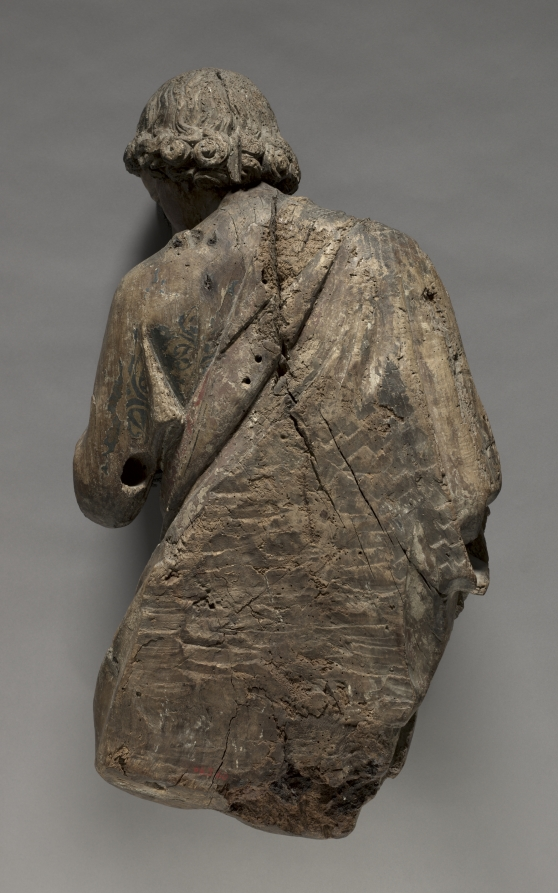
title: Angel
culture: France, vicinity of Reims, 13th century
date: c. 1250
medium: walnut with traces of gilding and polychromy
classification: Sculpture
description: Surviving in fragmentary condition, this pair of angels lacks lower arms, hands, wings, and attributes. Their original paint and gilding, now almost entirely lost, once rendered their garments a rich brocade and their hair a luxuriant gold. Nonetheless, in their graceful poses and sublime faces—which may portray tragic interest, anguish, or deep concern—their original delicacy and power are still evident. They embody the monumental style of 13th-century High Gothic cathedral sculpture in France. Their style specifically suggests they were carved in or around Reims, possibly by sculptors associated with the cathedral there. Their original placement is unknown, but they may have flanked an altar on columns.